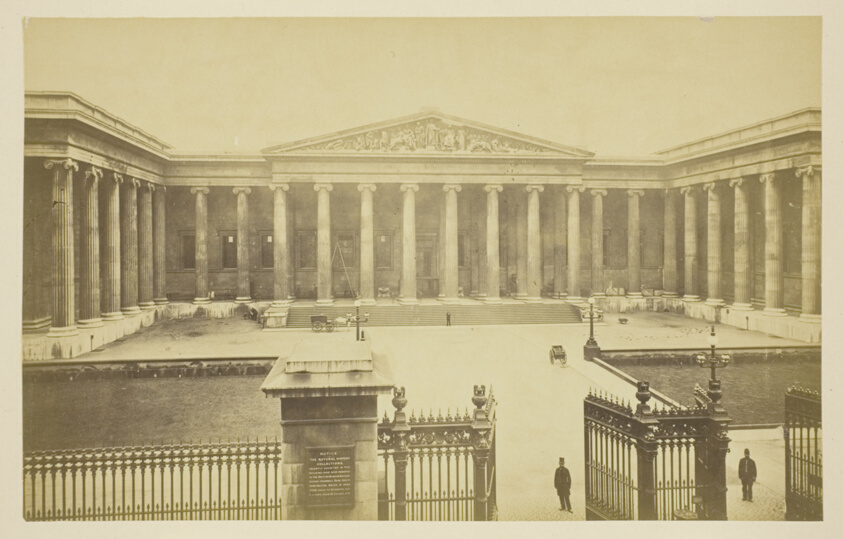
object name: Photograph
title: British Museum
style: 19th century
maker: Artist unknown; probably English, 19th century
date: 1850–1900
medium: Albumen print, from the album "Views of London"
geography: England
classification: albumen silver print; photographic process; photography; photograph